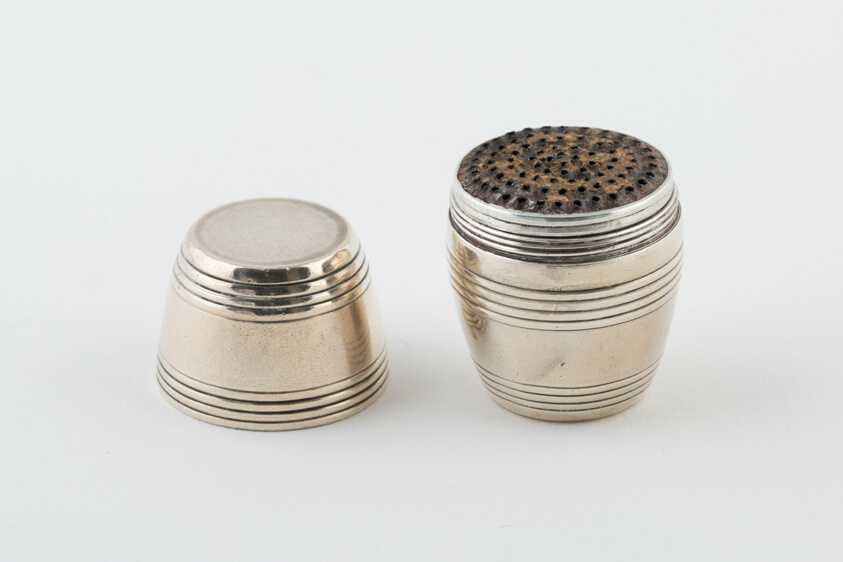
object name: Metalwork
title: Nutmeg Grater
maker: Thomas Matthews (England)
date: 1803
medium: Silver and steel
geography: England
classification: silver; metalwork; european decorative arts